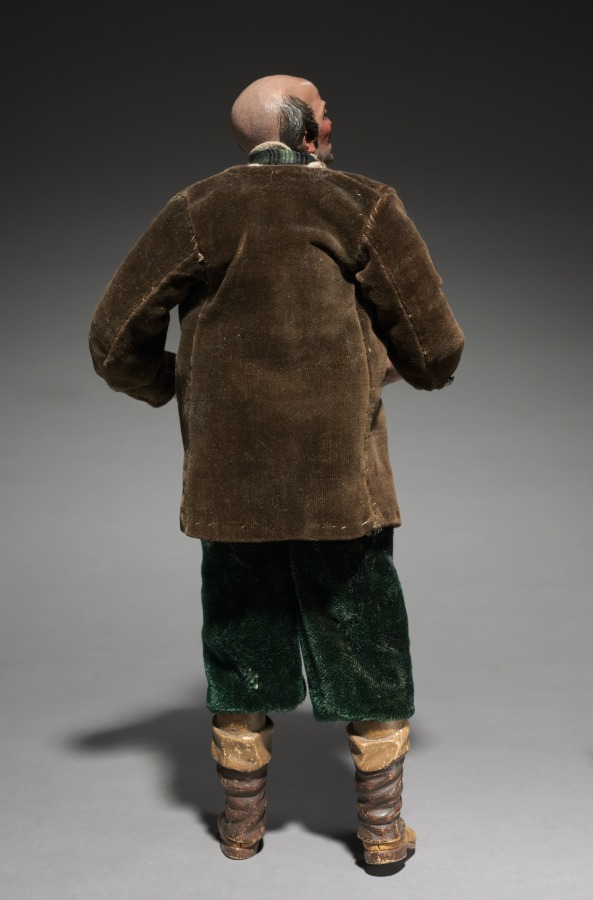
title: Figure from a Crèche: Standing Man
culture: Italy, Naples, late 18th-early 19th century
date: 1780–1830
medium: painted wood and terracotta with various textiles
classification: Sculpture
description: The practice of creating scenes of the Nativity for the home dates from the early 1700s in Italy, where people began to set up doll-like figures of about a foot or less in height. The custom was particularly popular in Naples around 1800, where crèche scenes (crèche means cradle, or crib) included many figures, whose heads and hands of painted terracotta, stuffed cloth bodies, and clothing adapted from contemporary local costumes gave them an amazingly realistic character. Representations of the birth of Jesus can be traced to the first few centuries of Christianity. Both living creatures and sculptural depictions of them were used from early times. By the late middle ages it was customary to create life-size figures of wood or stone, naturalistically painted, to represent the characters who participated in the events of Jesus's early life. These sculptures were then arranged in scenes illustrating one or both of the most important of these events, the Adoration of the Shepherds and the Adoration of the Magi-the three kings from the East who came to pay homage to the Christ child. Used in churches, these large figures were especially popular in Italy, Central Europe, Spain, and Portugal.